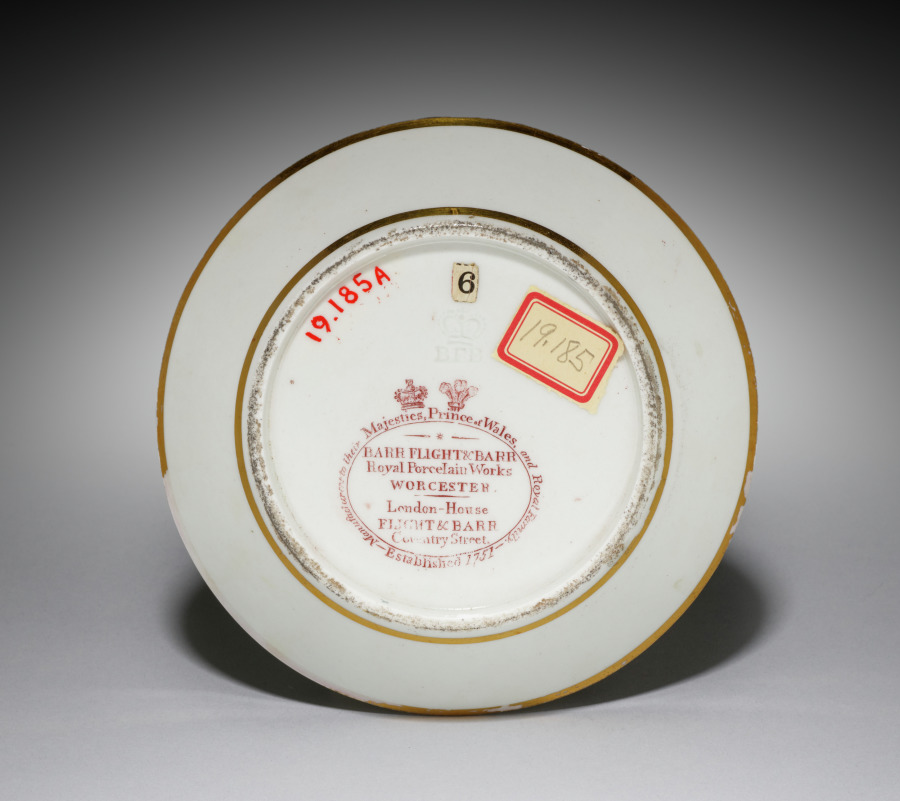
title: Saucer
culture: England, 19th century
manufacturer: Worcester Porcelain Factory (British, established 1751)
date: 1807–1813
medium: porcelain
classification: Ceramic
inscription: in overglaze red: "Barr, Flight and Barr/ Royal Porcelain Works/ Worcester/ London -- House/ Flight & Barr/ Coventry Street," surrounded by: "Manufacturers to their Majesties Prince of Wales and Royal Family. Established 1751."